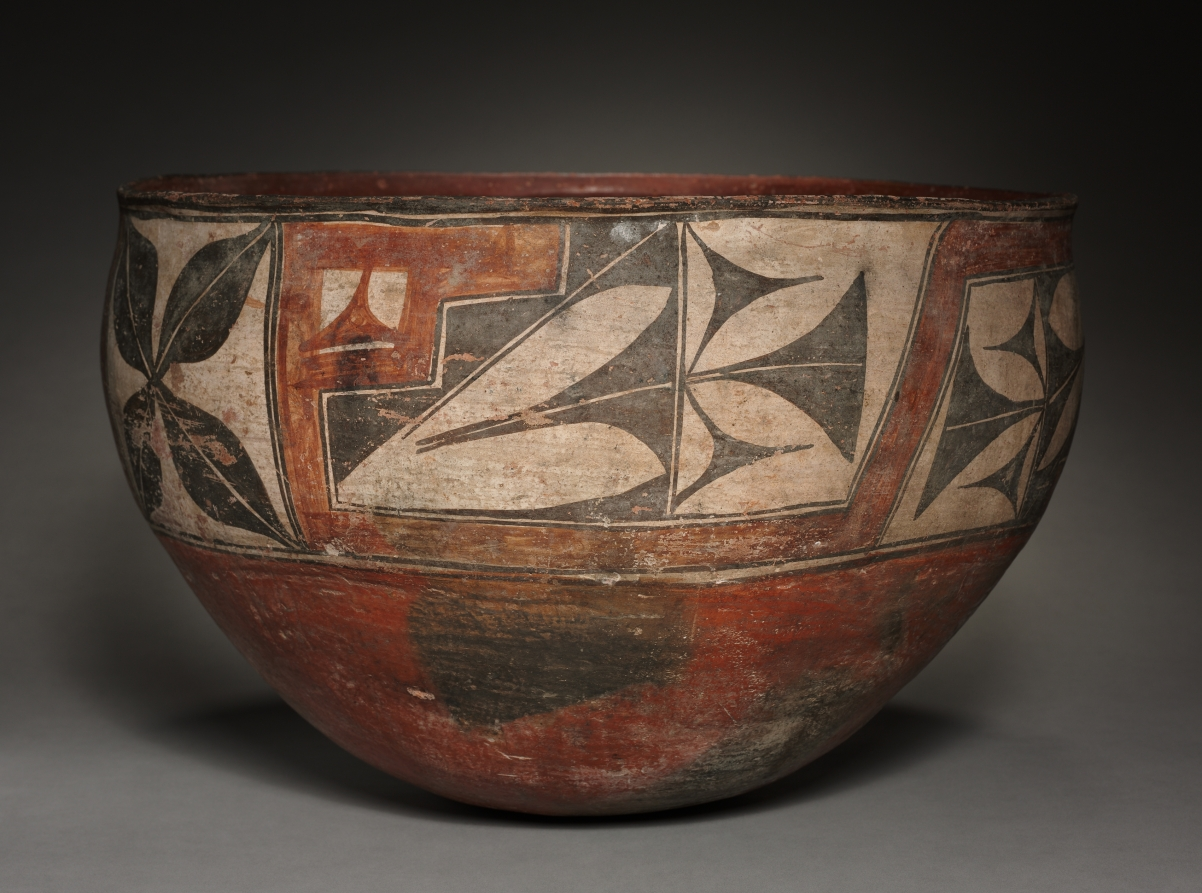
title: Dough Bowl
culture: Southwest,Pueblo, Zia, Post-Contact Period,19th century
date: 1890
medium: ceramic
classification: Ceramic